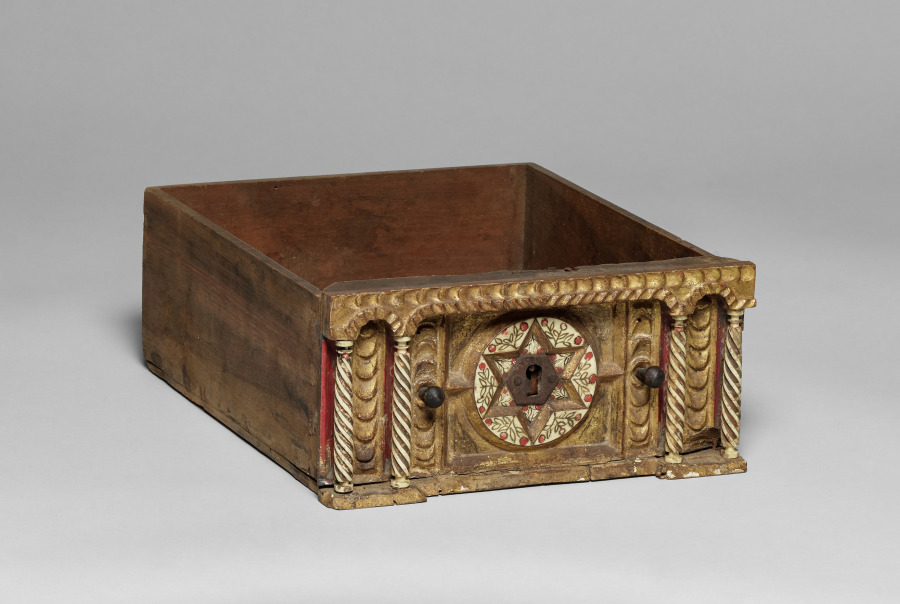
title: Chest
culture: Spain, Colonial, late 17th Century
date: late 1600s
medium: turned and joined wood, gilded and painted red with applied bone columns and bone inlays, wrought iron hardward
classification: Furniture and woodwork